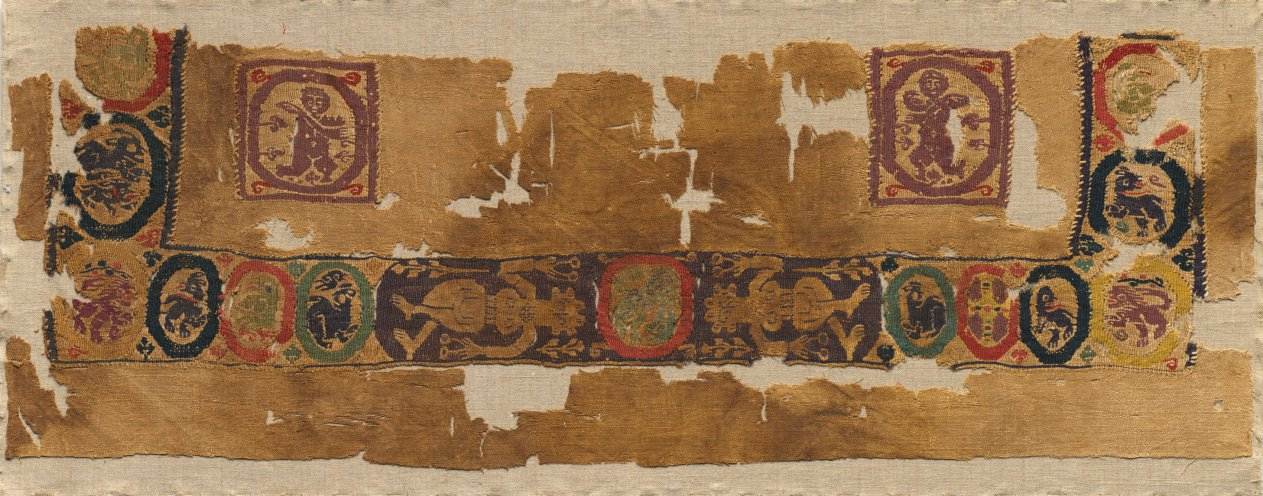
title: Fragment of a Tunic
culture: Egypt, Byzantine period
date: 600 – 650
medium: tabby weave with inwoven tapestry ornament, linen and wool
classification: Textile